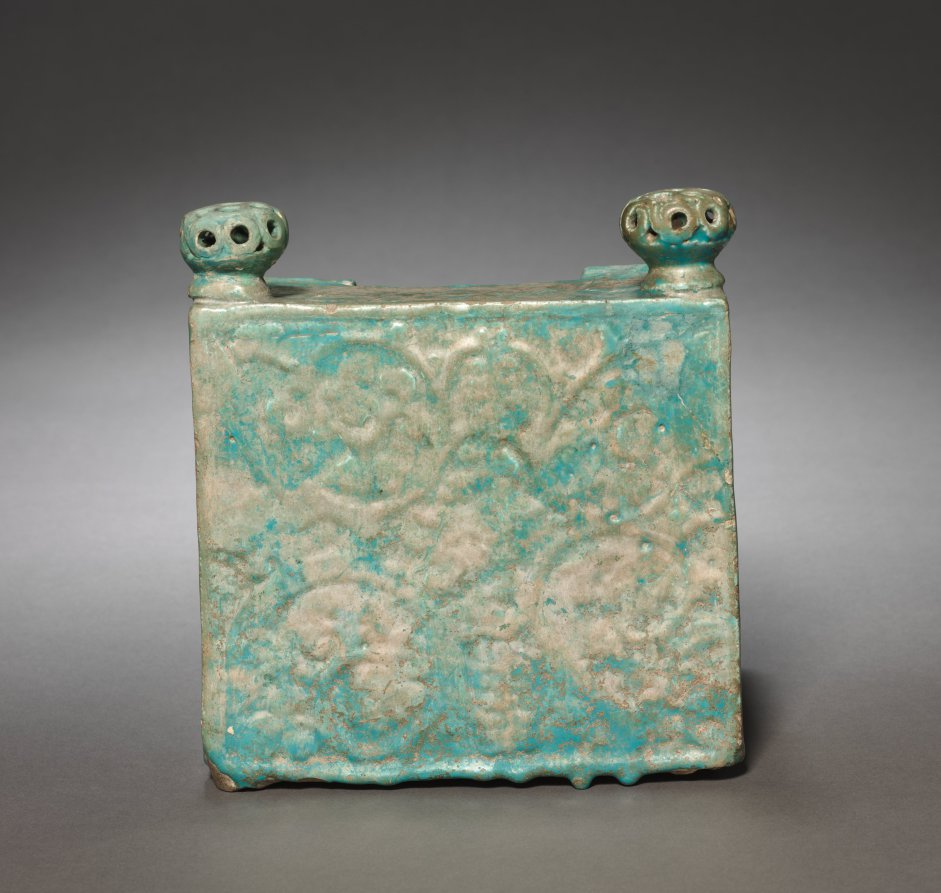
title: Casket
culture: Syria (Raqqa), Ayyubid Period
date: late 1100s–1200s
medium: fritware with molded design under glaze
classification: Ceramic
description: This square fritware box originally had a with hinged top. It is covered on the inside and outside with opaque turquoise glaze. The top back corners of the casket are surmounted by small openwork knobs. The casket would have rested on four feet, which have been lost. This is a ceramic imitation of a wooden box with metal fittings. The relief ornament imitates metal straps and a lock fitting.